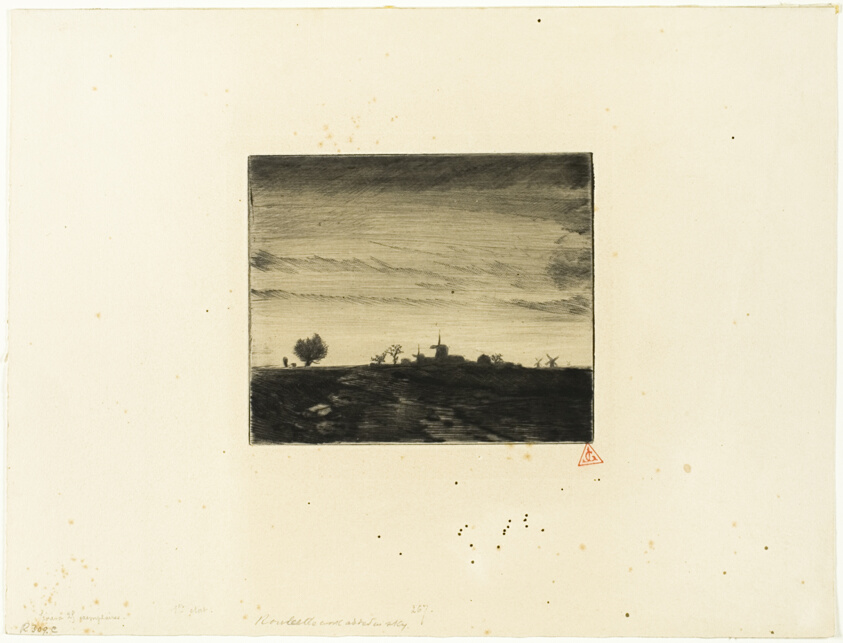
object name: Print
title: Landscape with Windmills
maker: Charles Émile Jacque (French, 1813-1894)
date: 1848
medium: Drypoint and roulette on cream wove paper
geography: France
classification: drypoint; print; prints and drawing